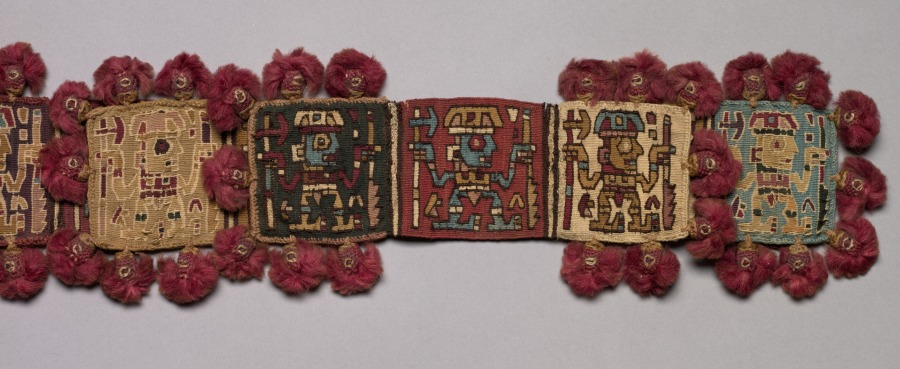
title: Band (Headband?)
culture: Central Andes, Moche-Wari Style, mid-7th to mid-9th century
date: c. 650–850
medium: Camelid fiber (alpaca; weft) and cotton (warp); tapestry weave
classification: Textile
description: This jewel-like textile, perhaps the only one of its kind, is made from a single band accordion-folded to form tabs, each edged with lush red tassels. Repeated in different colors down its length is the image of a warrior who holds an axe in one hand and a jagged, club-like object in the other. The reversed orientation of several of the warriors may be the result of the weaving method.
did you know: This unusual band may have been worn as a headband.